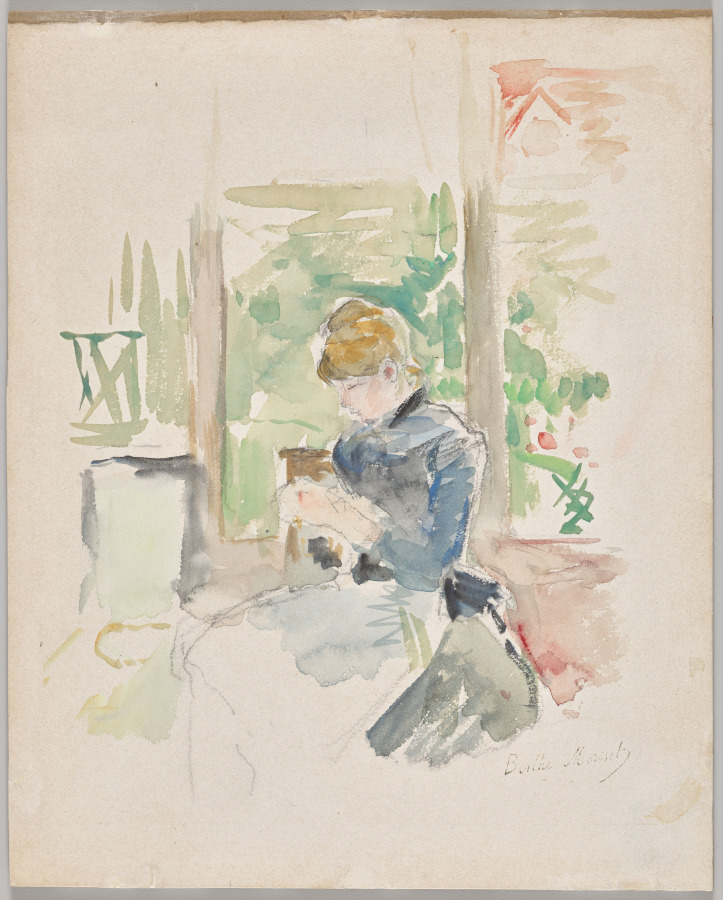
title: Sewing near the Window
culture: France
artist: Berthe Morisot (French, 1841–1895)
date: about 1885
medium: watercolor and graphite on paper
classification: Drawing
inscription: At lower right, in purple ink: stamped signature [Lugt 1826]; inscribed on verso, top center, in pencil: Portrait de la bonne de Mme Rouart (E[rnest] / Pasie (Euphrasie) / execute vers 1885 / congédiée vers 1885 / cousant au rez de chausée devant / bow window dominant sur jardin / toit des écuries sur la droite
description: This watercolor depicts Euphrasie, or Pasie, the nanny for Berthe Morisot’s young daughter Julie. Pasie appears in the artist’s apartment, sewing before a window during a contemplative moment. As with many of Morisot’s works in the medium, she used this example to develop the composition of a future painting into which she added Julie and more tightly cropped the scene. Watercolor was a constant interest for Morisot, and she practiced it from around 1870 throughout the rest of her career, creating both finished and preparatory works.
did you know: Edgar Degas admired Berthe Morisot’s watercolors, and seeing an example inspired him to invite her to participate in the Impressionists’ first group exhibition.